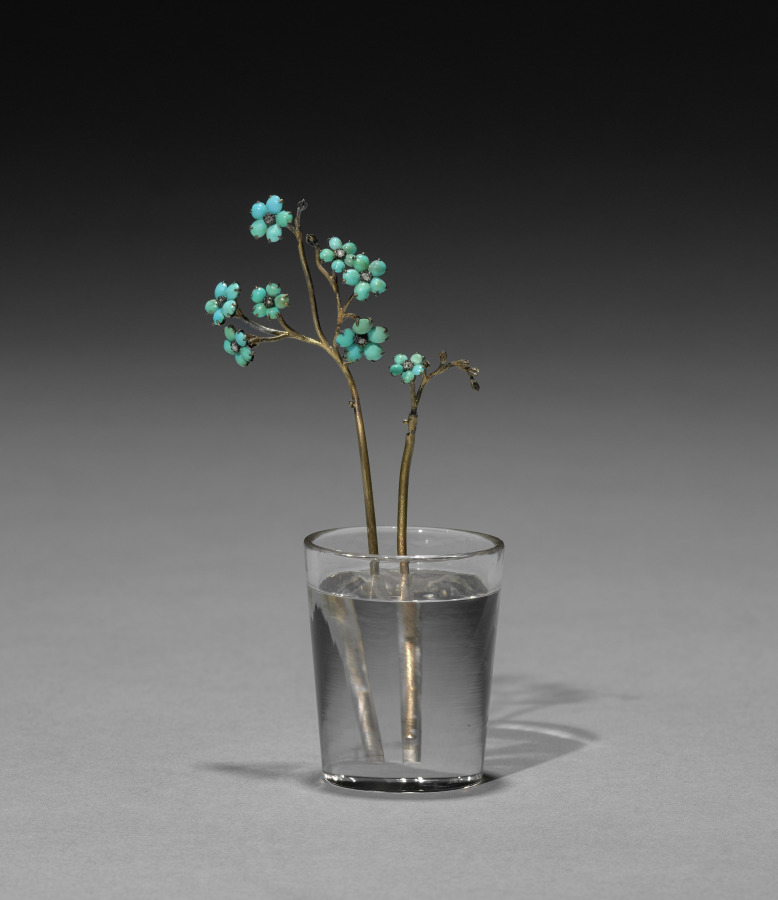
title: Flower Study of Forget-Me-Nots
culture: Russia, St. Petersburg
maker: House of Fabergé (Russian, 1842–1918)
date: c. 1885–1915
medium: turquoise, diamonds, rock crystal, silver gilt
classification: Miscellaneous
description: These delicate flowers, resembling a bouquet of forget-me-nots, are composed of finely rounded turquoise stones set around rose-cut diamonds on silver-gilt stems placed in rock crystal pots. Fabergé’s inspiration for his flower studies is said to have come from the floral brooches of precious stones that were made in the 1700s for Catherine the Great as well as from the Japanese art of flower arranging, known as ikebana. Fabergé’s flower studies were given as intimate gifts to friends by the tsarina and others in the court. She also liked to take them around to wherever the imperial family was residing as a reminder of spring during the harsh Russian winters.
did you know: The stems of Fabergé’s flower studies are set into little basins carved from rock crystal to resemble pots of water.